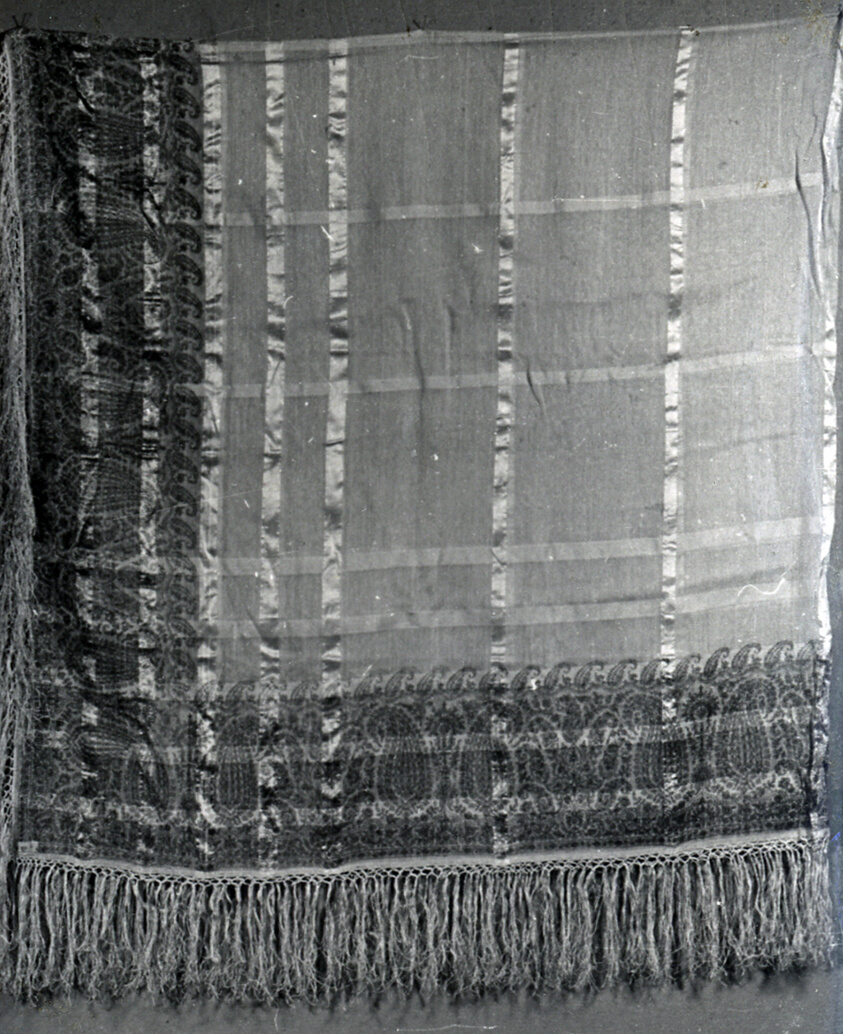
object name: Costume and Accessories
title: Shawl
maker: France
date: c. 1850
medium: Silk warp and wool weft, compound weave; printed; knotted silk fringe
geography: France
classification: textile; weaving - printed; costume; dress (garment); clothing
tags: fashion